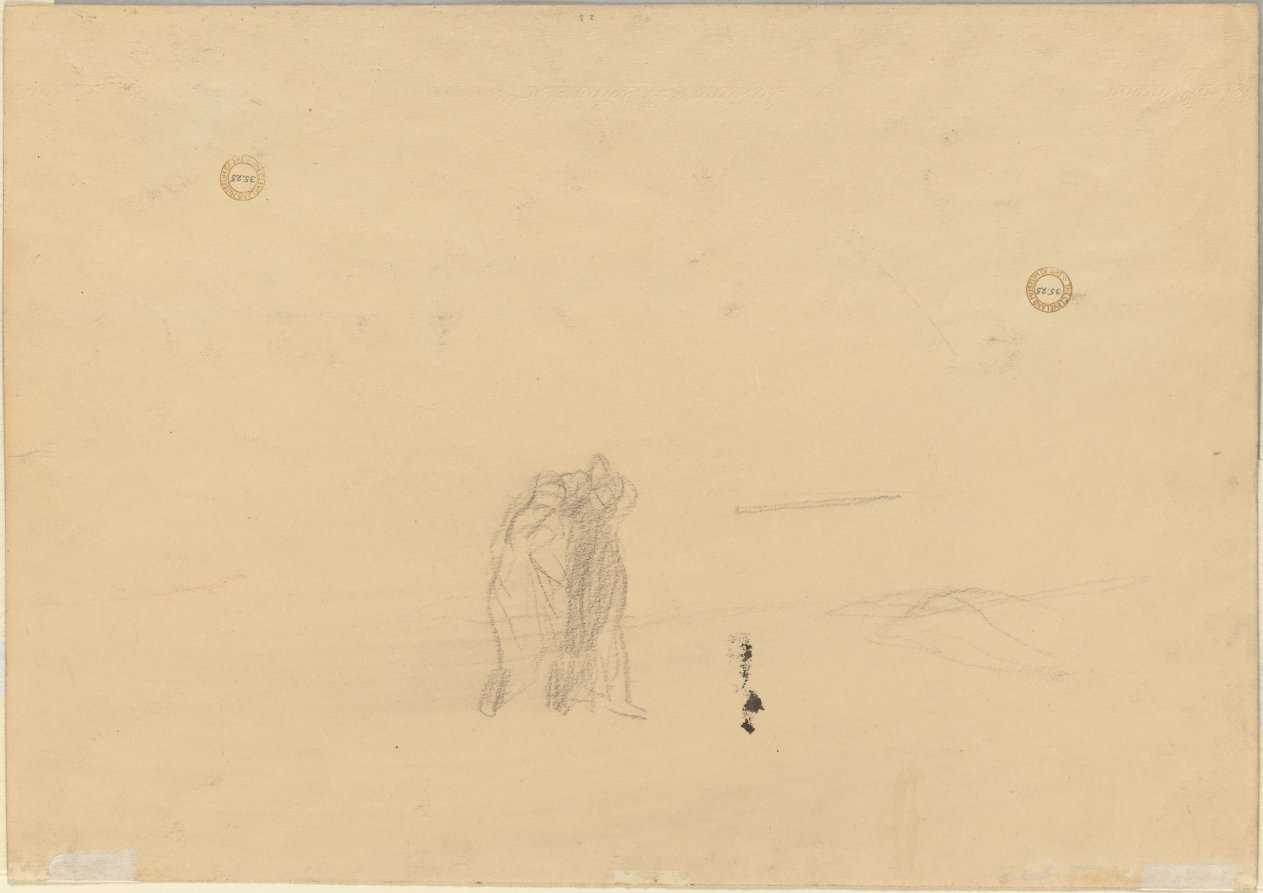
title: Figures in a Landscape (verso)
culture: France, 20th century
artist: Jean Louis Forain (French, 1852–1931)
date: c. 1919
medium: black crayon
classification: Drawing